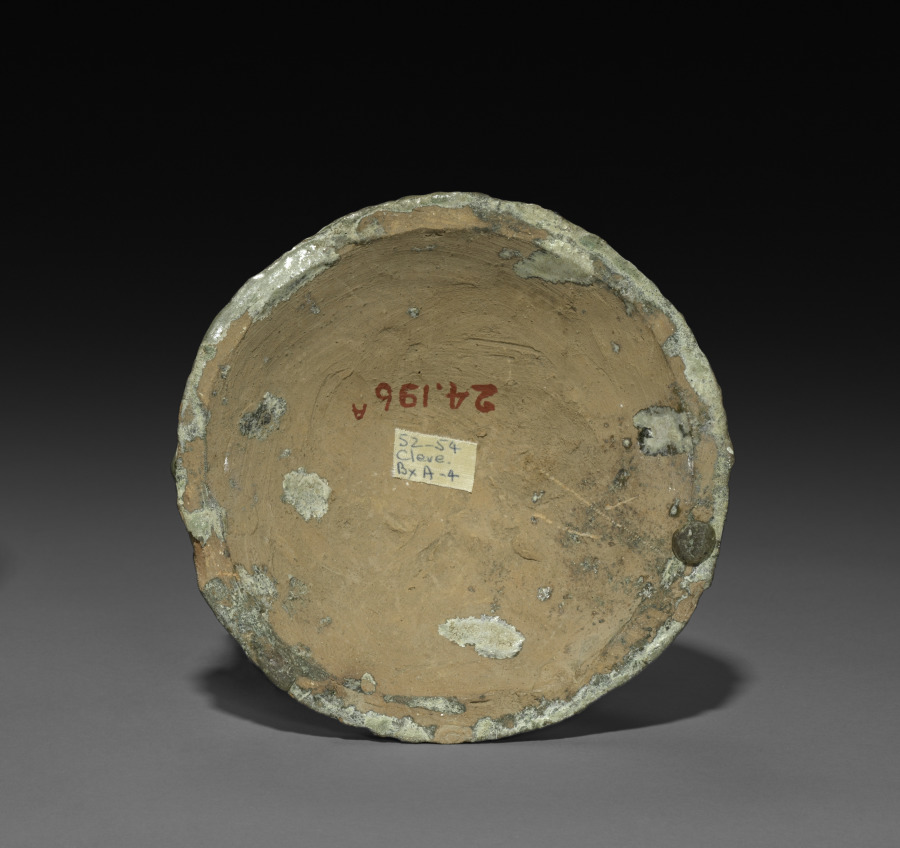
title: Covered Jar (Hu) (lid)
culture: China, Eastern Han dynasty (25–220 CE)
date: 25–220 CE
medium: earthenware with lead glaze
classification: Ceramic